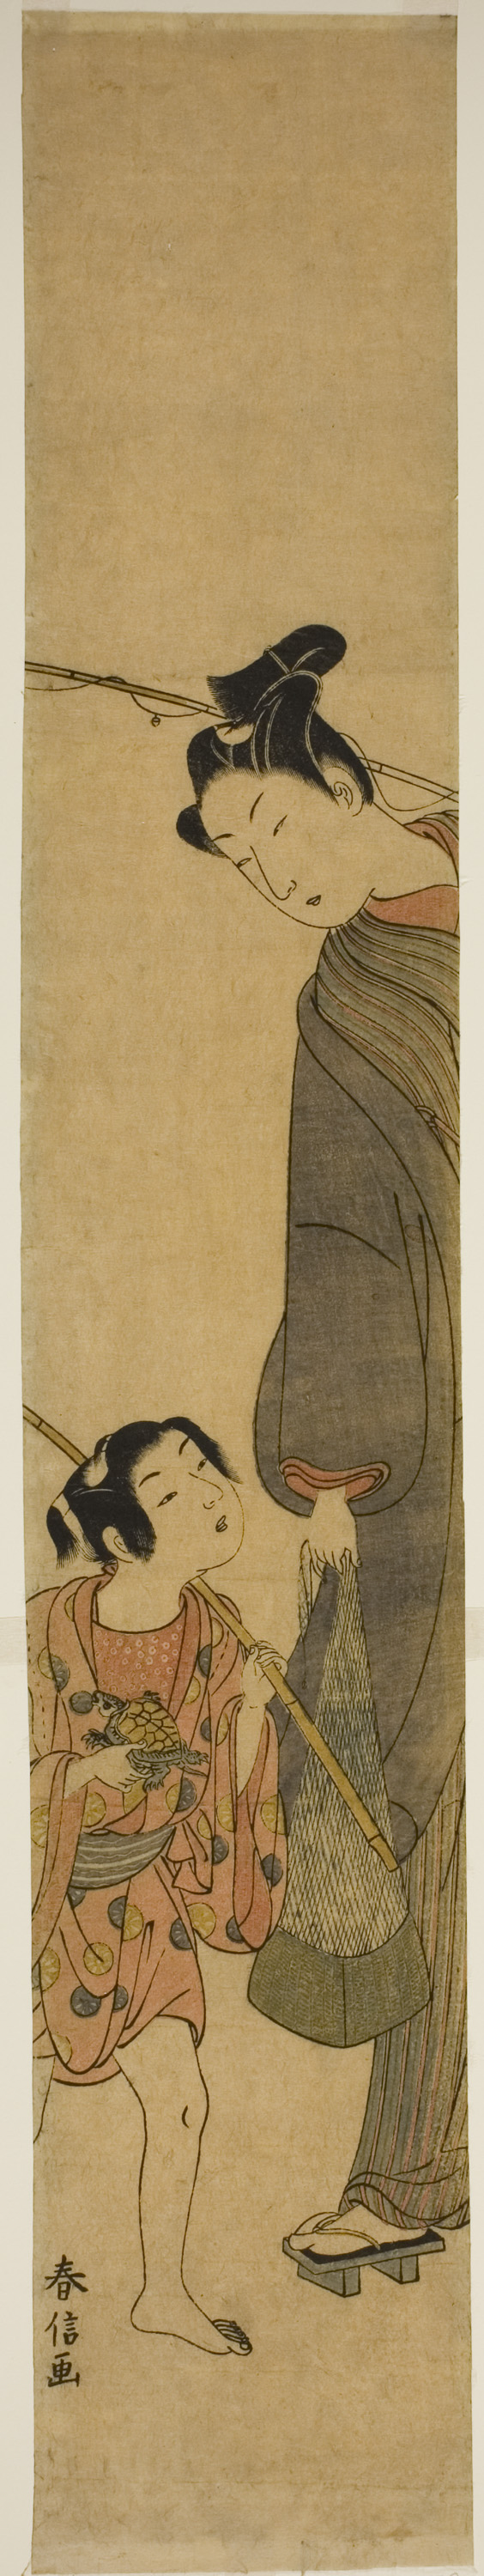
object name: Print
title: Young Man and Boy Returning from Fishing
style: Japanese (culture or style)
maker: Suzuki Harunobu 鈴木 春信; Japanese, 1725 (?)-1770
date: c. 1767/68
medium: Color woodblock print; hashira-e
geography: Japan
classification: woodblock print; print; asian art